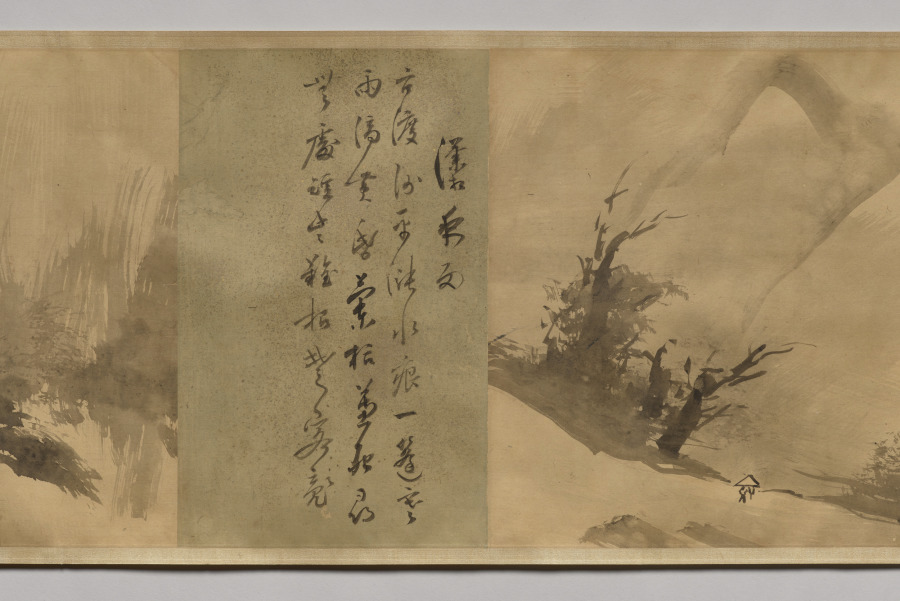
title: Poems and Pictures of the Eight Views of Xiao-Xiang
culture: Japan, Momoyama period (1573–1615)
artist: Unkoku Tōgan (Japanese, 1547–1618)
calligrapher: Inkei Gentetsu (Japanese, 1562–1612)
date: 1605–12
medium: Handscroll; ink on paper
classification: Painting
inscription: Each painting sealed with red gourd-shaped seal reading Unkoku (雲谷) and a square seal reading Tōgan (等顔).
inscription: Each painting prefaced with a titled poem on the Eight Views of Xiao-Xiang by Yujian Ruofen (active late 13th century) inscribed by Japanese Buddhist monk Inkei Gentetsu (1562–1612).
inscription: 右寫玉㵎之筆勢／雪舟末葉等顔筆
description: Unkoku Tōgan brushed these scenes using the splashed-ink technique associated in Japan with the Chinese monk Yujian Ruofen (active late 1200s). Xiao-Xiang refers to the region in present-day Hunan province, where the Xiang River and its tributaries converge. Each of the eight views evokes a time of day or season. The earliest surviving series of Xiao-Xiang paintings is by Wang Hong (active mid-1100s), but textual evidence tells us the theme appears earlier. It was later adopted in Japan and Korea, as seen here. The poems were inscribed by Inkei Gentetsu, the third abbot of the Rinzai Zen temple Tōshunji, Japan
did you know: The “Tō” of Tōgan comes from the name of painter Sesshū Tōyō (1420–1506).